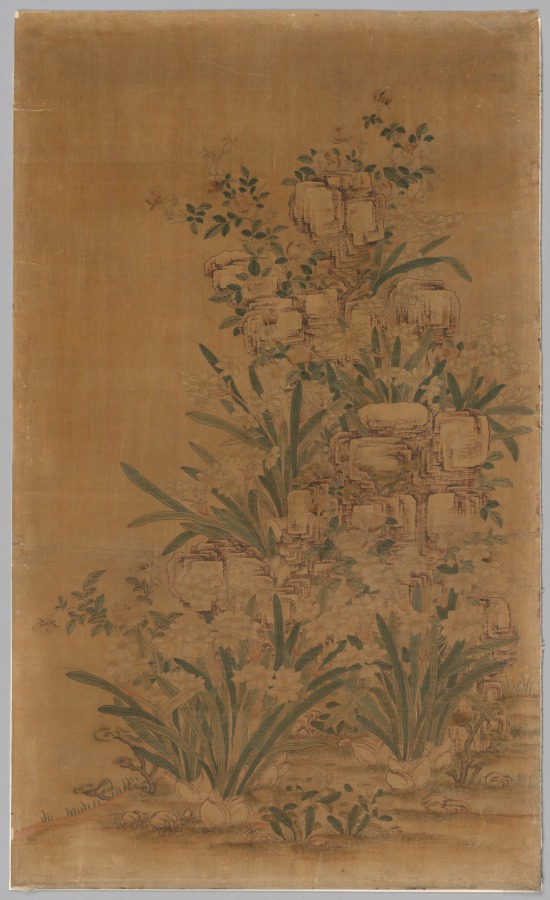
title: Kesi Panel: Rocks and Narcissus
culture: China, Qing dynasty (1644-1911)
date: 1700s–1800s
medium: silk, embroidered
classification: Textile